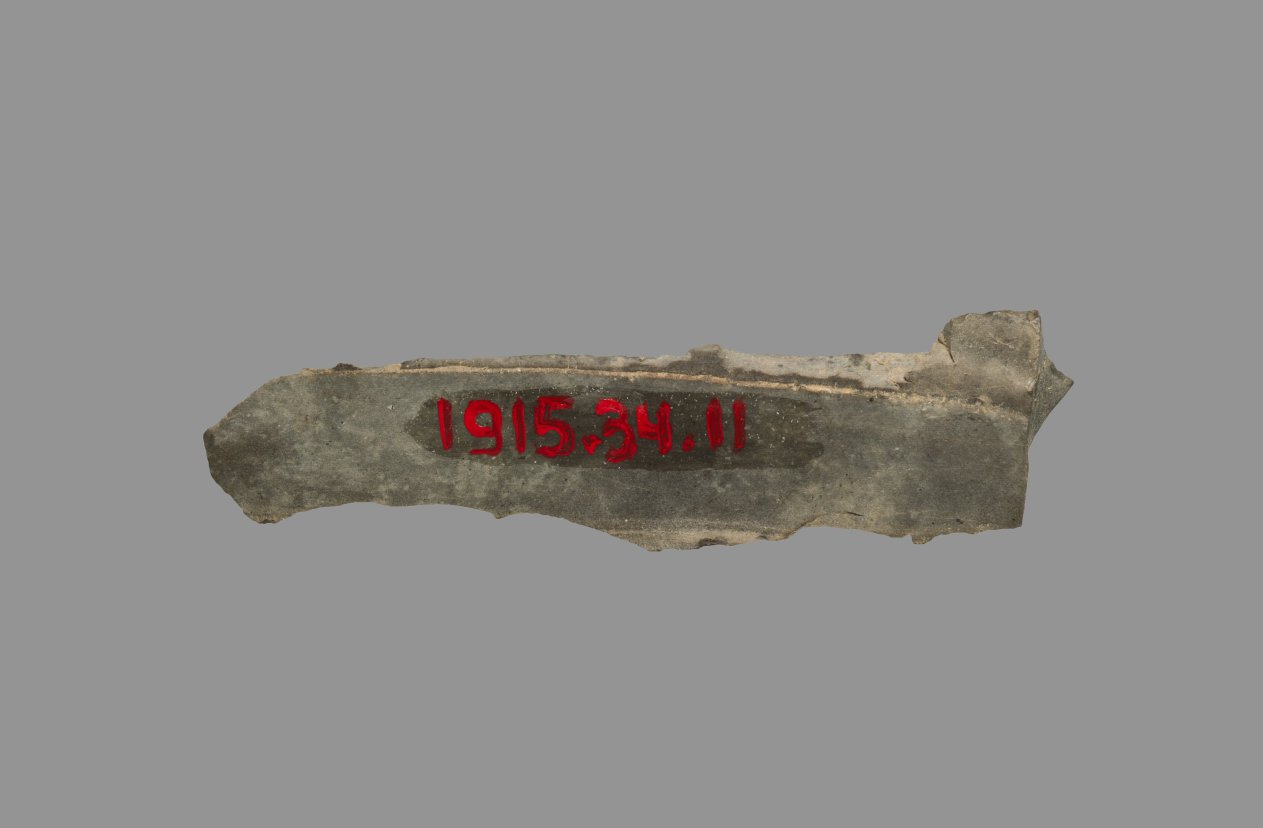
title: Sickle Blade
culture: Egypt, Middle Kingdom (2040–1648 BCE), Dynasty 12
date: 1980–1801 BCE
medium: flint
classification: Implements